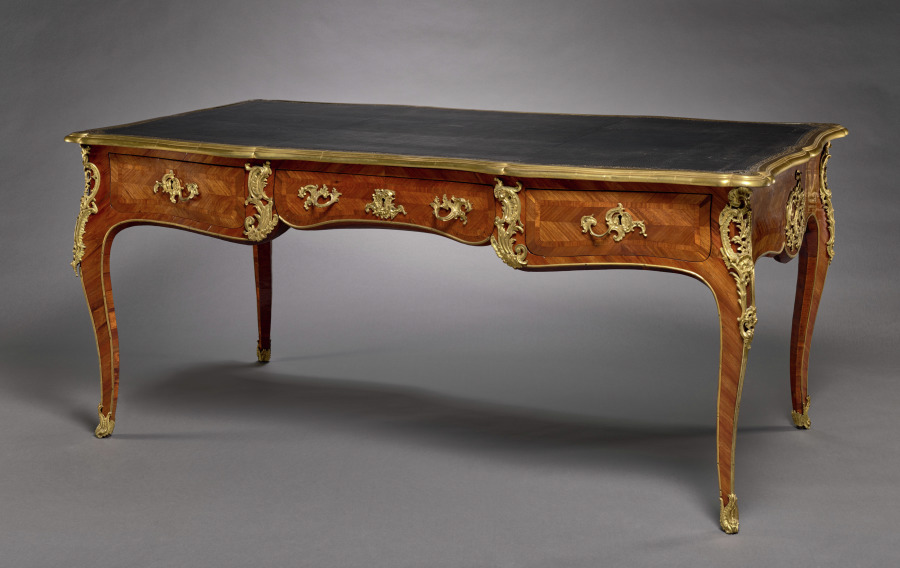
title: Table Desk (bureau plat)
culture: France, Paris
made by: Jacques Dubois (French, 1693–1763)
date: c. 1750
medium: wood marquetry with gilt bronze mounts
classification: Furniture and woodwork